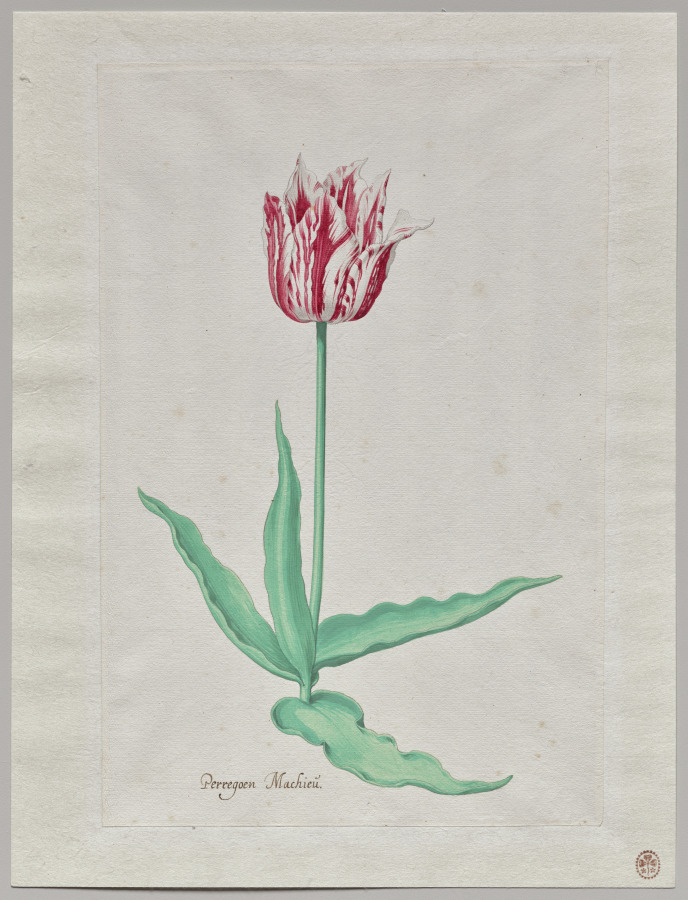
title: Study of a Tulip (Perregoen Machieu)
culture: Netherlands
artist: Pieter Holsteyn II (Dutch, c.1612–1673)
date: c. 1645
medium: Point of brush and transparent and opaque watercolors with traces of graphite and gum glazing on antique laid paper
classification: Drawing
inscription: Recto, lower right: small botanical stamp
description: This image of a tulip was made as part of a tulip book used as a grower’s marketing tool during the so-called tulip mania, a speculative bubble in 17th-century Holland, when ten tulip bulbs could cost more than a stately Amsterdam canal house. The striations on the tulip, which were caused by a virus in the bulb, made it especially valuable. Pieter Holsteyn II was one of many artists in the Netherlands at the time who specialized in botanical illustration.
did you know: In 17th-century Holland, some tulip bulbs were as expensive as a stately Amsterdam canal house.